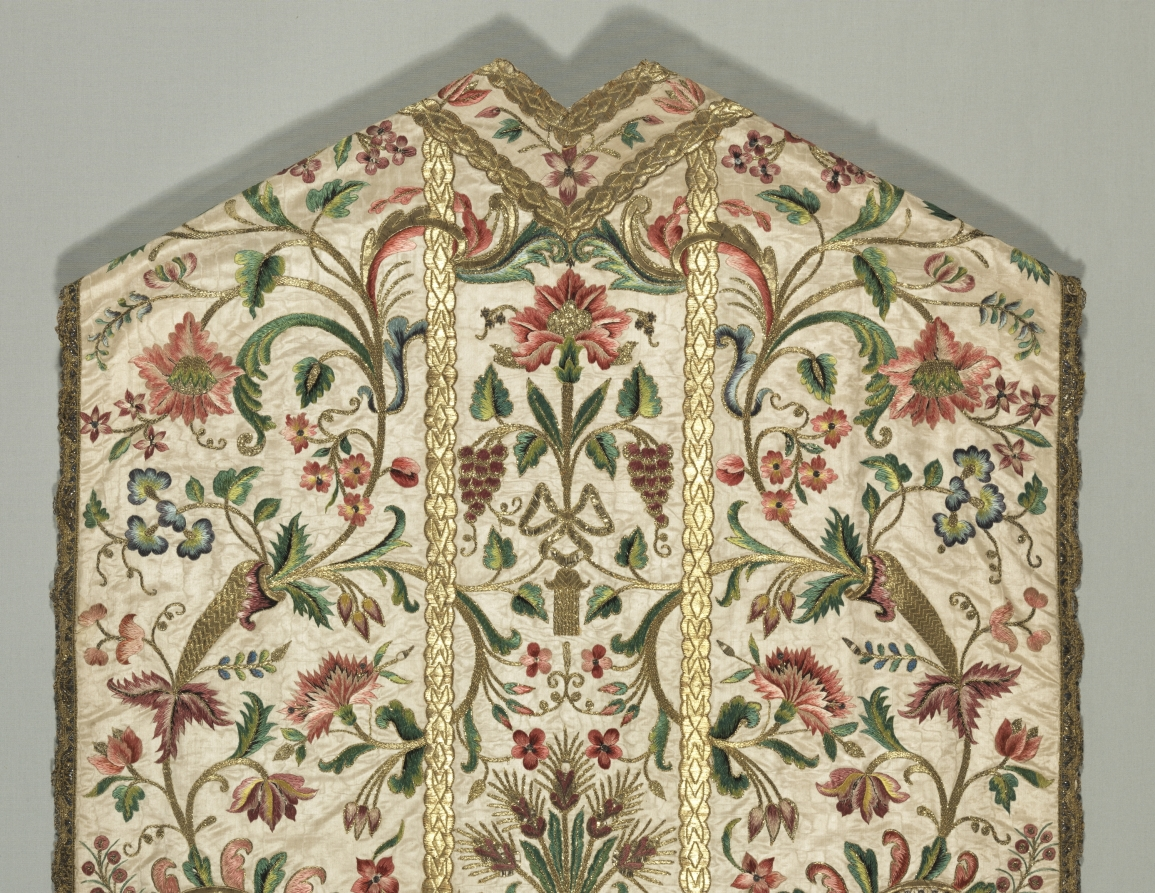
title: Chasuble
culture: Italy, 18th century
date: 1700s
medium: Silk and metallic threads; embroidery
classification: Textile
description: A beautiful design emanates from a vase in the center of this chasuble, displaying symmetrical flora that extend across embroidered gold braids into graceful curvilinear cartouches, reflecting contemporary architectural decoration. Also in the center, sheaves of wheat and grapes represent the bread and wine of the Mass. Gold sequins within thread-outlined squares illustrate fine quality workmanship. The decoration of the stole and chalice veil is similar to the chasuble, also on moiré (watered) silk fabric. The stole, an insignia of the office of deacons and priests, is worn under a chasuble, and the chalice veil—bearing the monogram of Jesus Christ, ihs, in the center—covers the chalice and paten (the plate holding the Eucharistic bread).